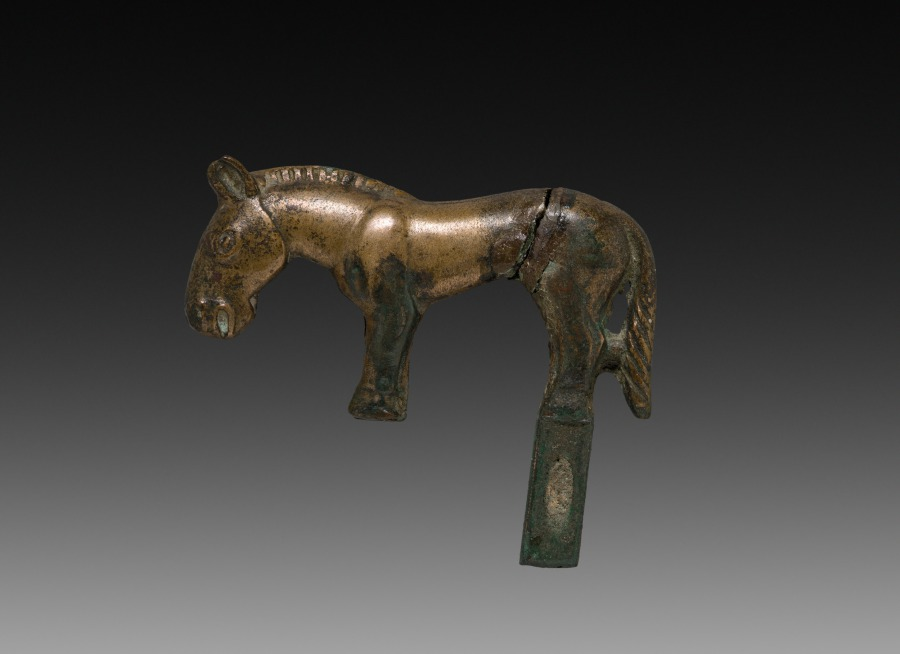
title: Wild Horse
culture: China, Ordos Region, Han dynasty (202 BCE–220 CE)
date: c. 100 BCE–100 CE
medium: cast bronze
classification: Sculpture